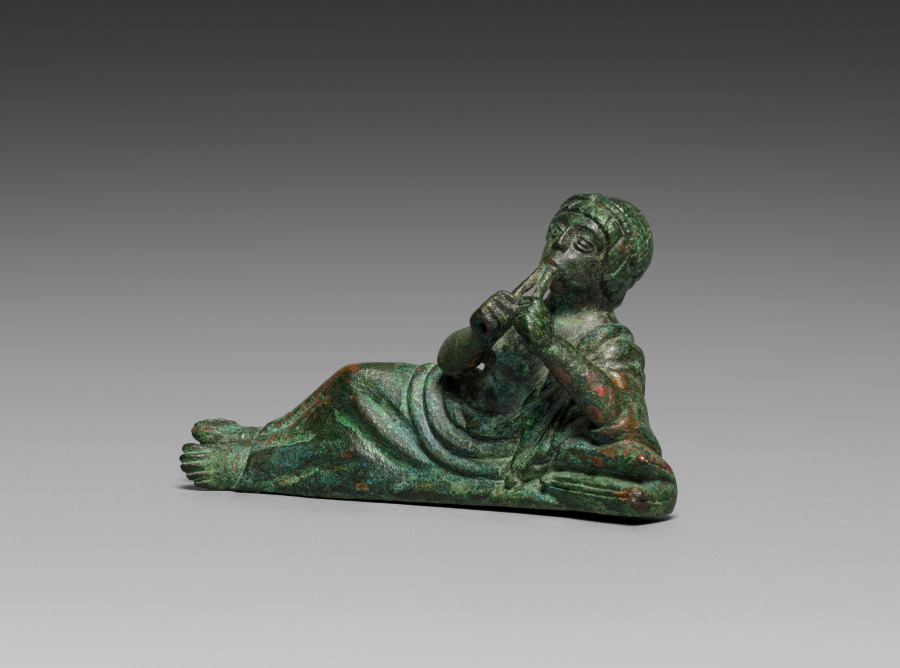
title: Vessel Ornament of Reclining Pipes Player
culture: Etruscan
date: probably 400–375 BCE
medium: bronze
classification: Sculpture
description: This bronze banqueter figurine was one of six once adorning the rim of a large basin, now lost. Cast in molds with individualized details, most have grooves on their underside to attach to the basin. Minute traces of gilding remain on areas of clothing and skin (mostly visible only under magnification), suggesting that they may have been completely gilded. Two handles in the form of hippocampi, horses with serpentine tails, also belonged to the basin and are now displayed at the Michael C. Carlos Museum at Emory University. The basin may have been used to hold liquid for a banquet, or was perhaps funerary. This bronze reclining figurine raises his head and blows into a set of pipes. The tips of the pipes are broken off. Some gilding remains on the mouth and chin. The figurine wears a himation over his body and has a bare chest. Two pillows prop up his left elbow. His hair falls over his forehead in square bangs.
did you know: Guests were often invited to play instruments and sing during symposia.